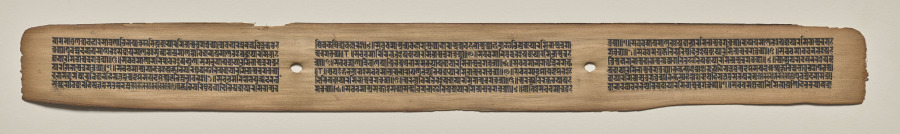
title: Text, folio 168 (recto), from a Manuscript of the Perfection of Wisdom in Eight Thousand Lines (Ashtasahasrika Prajnaparamita-sutra)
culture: Eastern India, Bihar, Vikramashila Monastery. Painting: Nepal, Kathmandu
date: Sunday, September 14, 1119 (year 239 of the Newar Samvat in the month of Ashvina)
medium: gum tempera and ink on palm leaves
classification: Painting